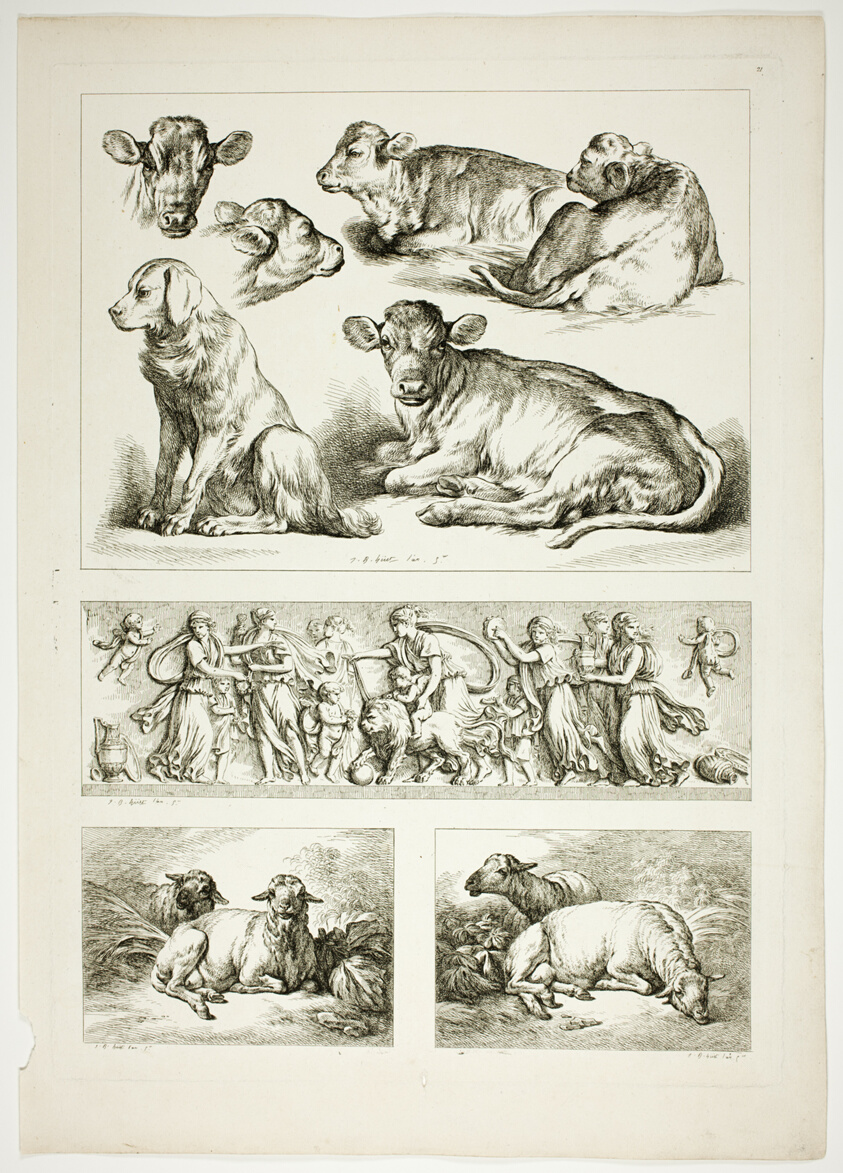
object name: Print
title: Plate 20 of 38 from Oeuvres de J. B. Huet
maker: Jean Baptiste Huet (French, 1745-1811)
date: 1796–99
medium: Etching on paper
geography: France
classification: etching; print; prints and drawing